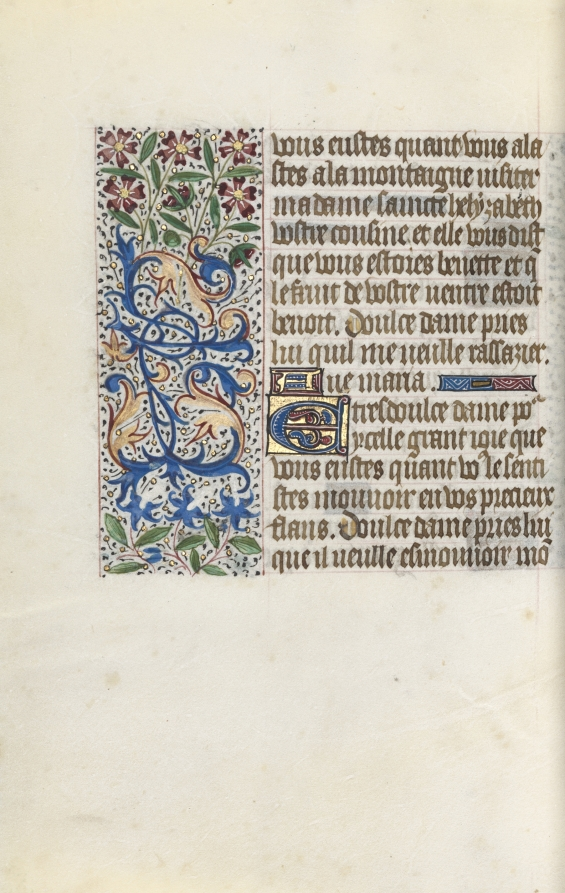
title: Book of Hours (Use of Rouen): fol. 147v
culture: France, Rouen, 15th century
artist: Master of the Geneva Latini (French, active Rouen, 1460–80)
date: c. 1470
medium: ink, tempera, and gold on vellum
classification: Bound Volume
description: In the late 1400s and early 1500s Rouen was an established and important center of book production. The city’s cathedral had a wealthy chapter that spent large sums of money to commission books and to maintain its extensive library. The stationers and booksellers would have likely been concentrated in or near the cathedral precinct. This artist, named after a manuscript now in Geneva, was Rouen’s principal illuminator during the second half of the 1400s.